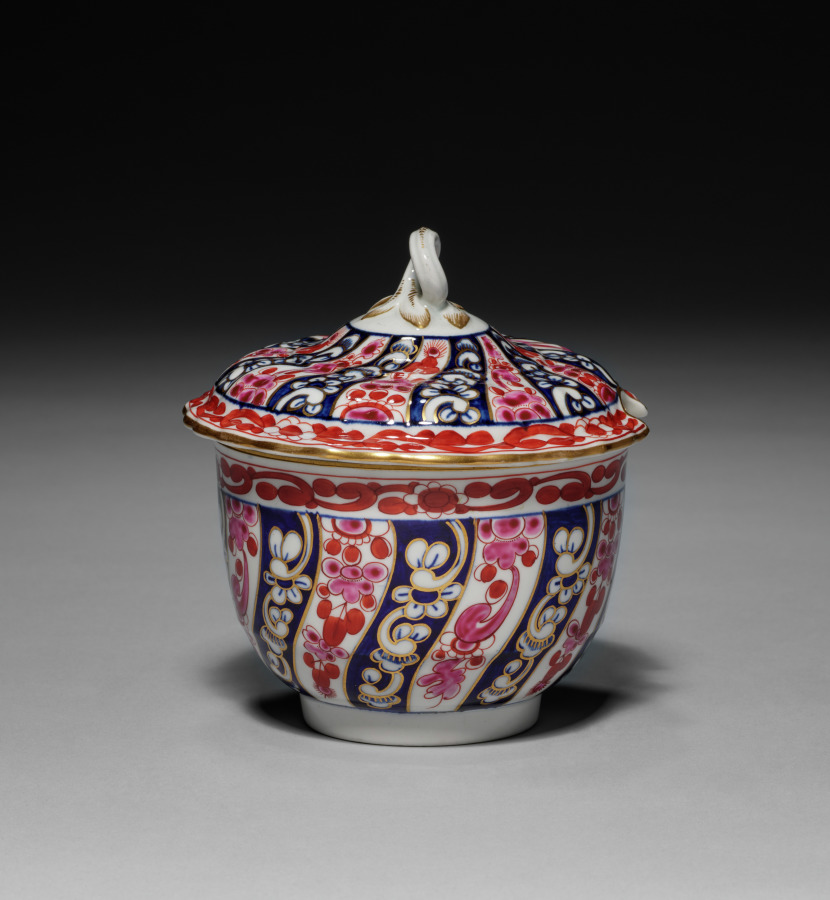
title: Covered Bowl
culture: England, 18th century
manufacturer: Worcester Porcelain Factory (British, established 1751)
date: c. 1770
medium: porcelain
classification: Ceramic